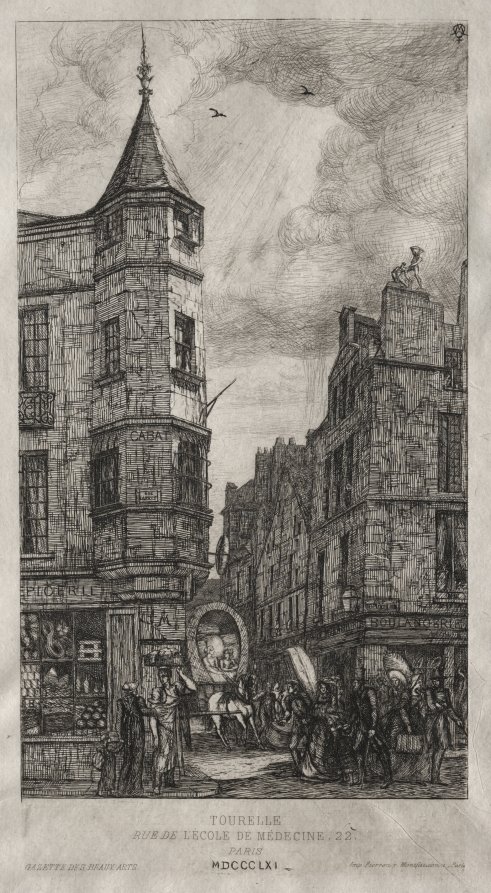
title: House with a Turret, No. 22 Street of the School of Medicine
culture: France, 19th century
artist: Charles Meryon (French, 1821–1868)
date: 1861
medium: etching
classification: Print